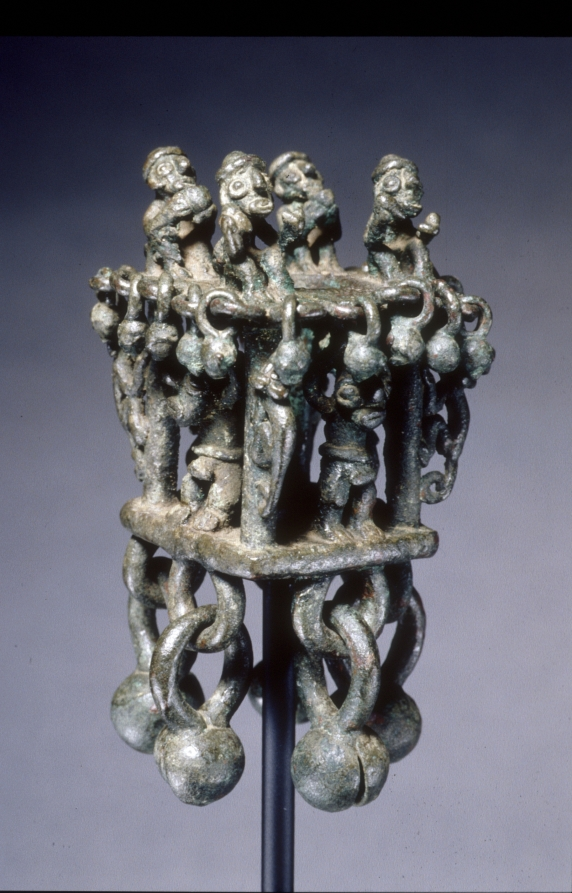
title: Finial of a Staff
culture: Peru, North Coast, Chimú style (900-1470)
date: Chimú style (900–1470)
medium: cast copper alloy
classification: Metalwork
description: Look carefully at this scepter top; the corrosion obscures details, but the scene is interesting.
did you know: Many ancient Andean artworks incorporate the element of sound.